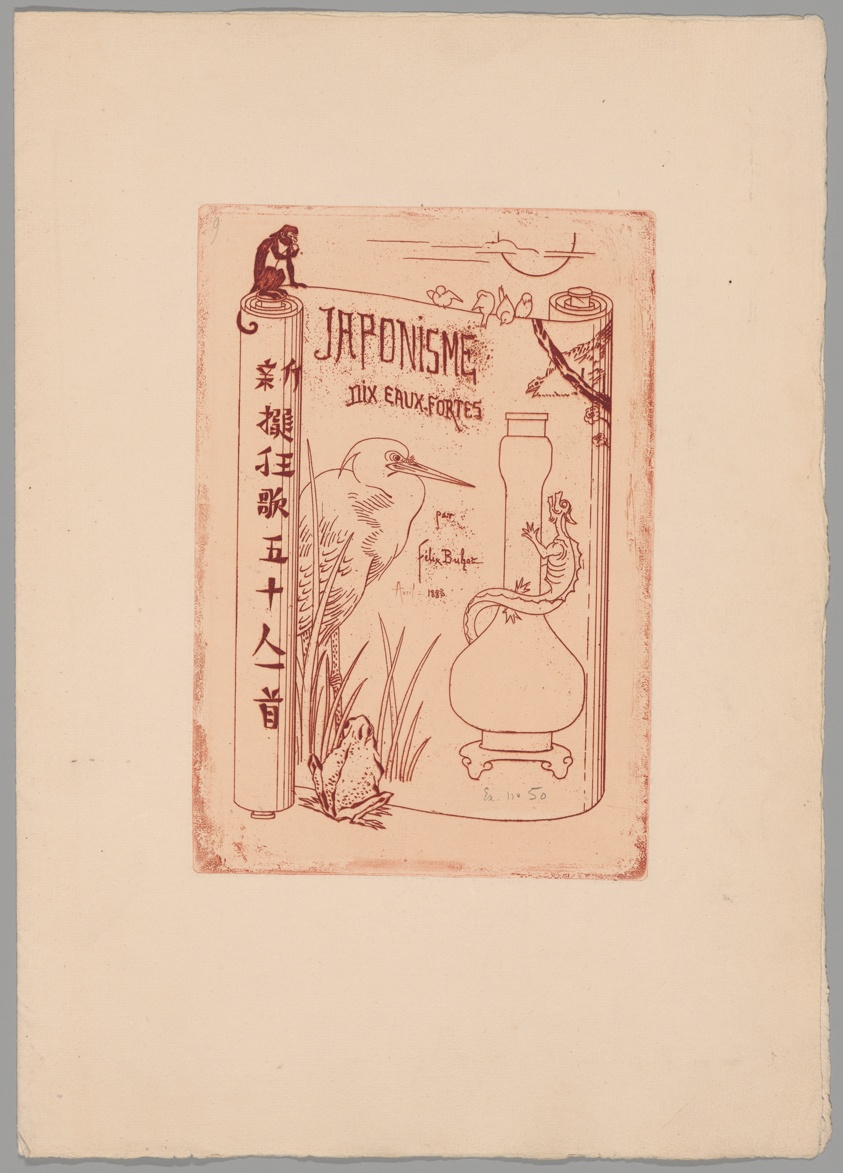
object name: Print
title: Japonisme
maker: Felix Hilaire Buhot; French, 1847-1898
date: 1883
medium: Etching in red ink on cream laid paper (front cover); etching and aquatint in blue ink (back cover)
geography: France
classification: prints and drawing; etching; paper; print